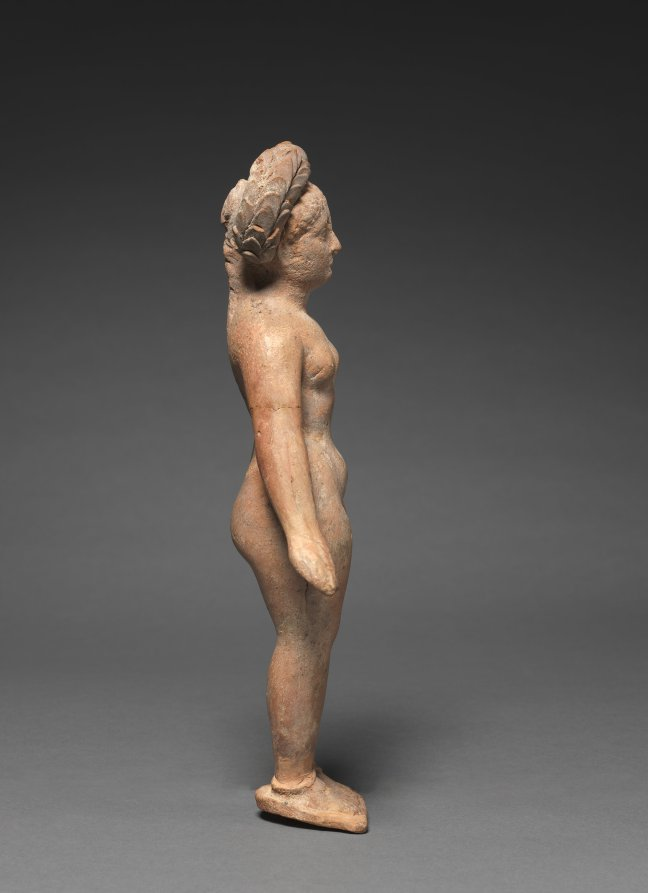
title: Fertility Goddess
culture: Pakistan, Gandhara, reportedly Charsada, early Kushan period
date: 100s CE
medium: terracotta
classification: Sculpture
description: Female figures fashioned from terracotta were found at large man-made pools of water in early Buddhist sacred compounds. They indicate the importance of art and rites associated with fertility and childbirth among the Buddhist laity, of which women were a major component. The wreath, small breasts, and gentle modeling of her full-hipped body associate this figure with Greco-Roman imagery.